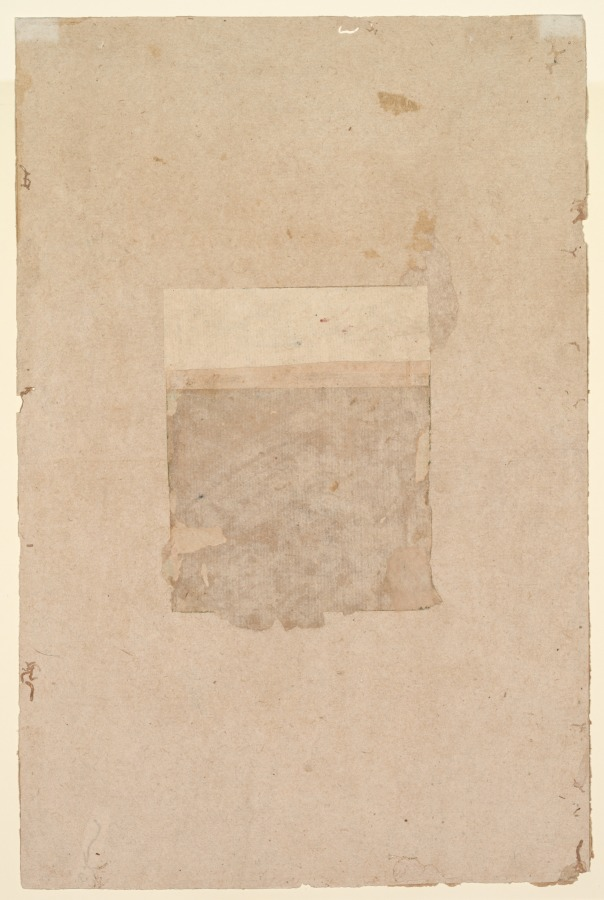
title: A royal ram with a gold chain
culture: India, Mughal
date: c. 1585; border added probably 1700s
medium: Gum tempera and gold on paper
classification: Painting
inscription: Urdu inscription at top, in nasta‘liq script: sheep; Hindi inscription under left corner of painting, in devanagari script: Shri 6; Hindi inscription below painting, in devanagari script: 2, sheep; Hindi inscription, bottom center, in devanagari script: 674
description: The ram in this painting is a particularly well-groomed animal that was probably kept in the royal menagerie and attended to by special keepers. The puffs of hair on the ram’s back have been colored with henna, and he wears a decorative chain of bells across his chest. The Mughal rulers collected and exhibited specimens of various animals from their territories out of a scientific interest as well as a desire to display the extent of their influence over the land and its inhabitants.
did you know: Sheep with black and white markings like this are called Jacob sheep.